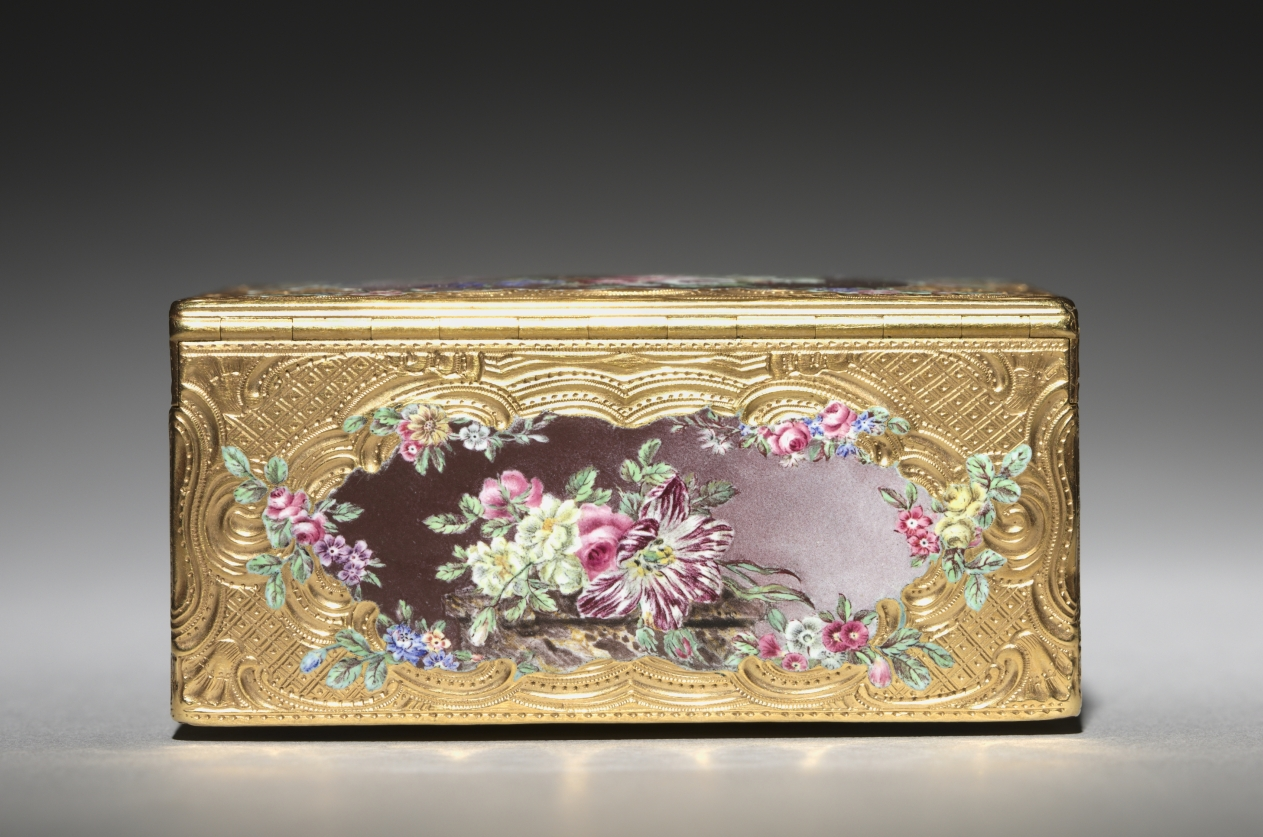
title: Snuff Box (Tabatière)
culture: France, 18th century (style of Louis XV)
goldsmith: Francois Guillaume Tiron (French)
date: 1756–57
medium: gold and enamel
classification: Miscellaneous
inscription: [Maker's mark of Francois-Guillaume Tiron, master goldsmith in 1747, inside cover; left wall]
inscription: [Warden's mark for Paris, 1756-1757, inside cover]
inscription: [Charge mark of Julien Berthe, Paris, 1750-1756, inside cover; left wall]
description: The miniature paintings that decorated snuff boxes were depicted in intricate detail requiring complex technical skill. This box’s miniatures are painted with enamel en plein, meaning the enamel has been applied directly to the metal of the box. A different enameling technique, basse-taille, is used to depict the doves and floral borders. Here, the gold has been chiseled away and filled with translucent enamel in order to produce a three-dimensional effect.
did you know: In the mid-1700s François-Guillaume Tiron worked alongside his brother, Jean-Marie Tiron, one of the most celebrated makers of gold boxes of the 18th century.